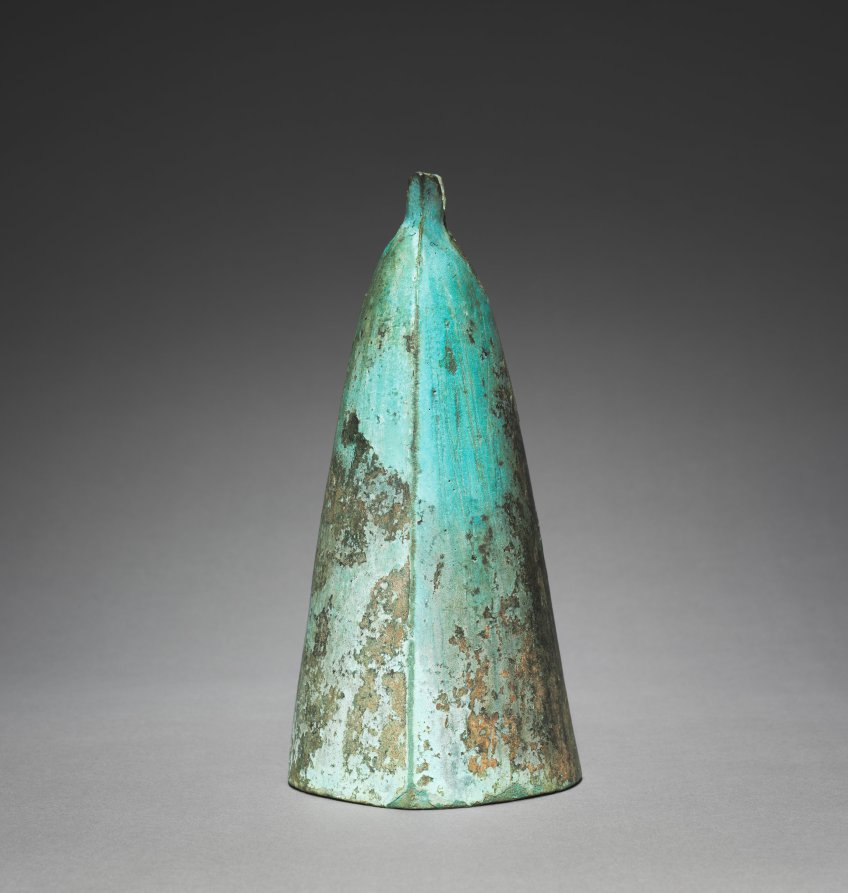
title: Bell with Diamond-Shaped Insignia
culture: China, along the southern borders, Eastern Zhou dynasty (770–256 BCE) to Han dynasty (202 BCE–220 CE)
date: 300s–100s BCE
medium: bronze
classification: Metalwork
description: These rare, elegant bronze bells were made in a tribal village along the southern borders of China. They differ greatly from bells made in the central regions, which often come in large sets and in varying sizes, and feature complex decorative patterns. The distinctive shape of these bells resembles a tall helmet topped by a pair of horns. A rope may have been tied around the horns so that the bells could be suspended. Each bell is decorated with a diamond-shaped insignia—probably to mark tribal affiliation. Although the bells are identical in size, each produces a different tone, which indicates that their casting was a highly refined process.